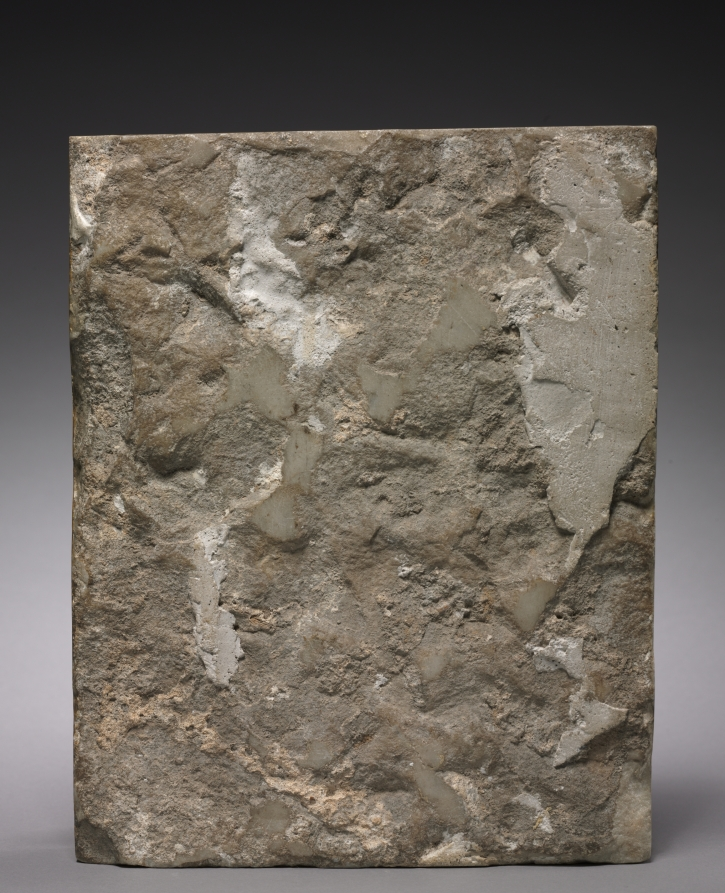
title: Philoctetes on the Island of Lemnos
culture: Italy, 16th century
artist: workshop of Giovanni Maria Mosca (Italian, 1495/99–1574)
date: c. 1510–1515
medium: marble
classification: Sculpture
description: A snake bit the Greek warrior Philoctetes en route to the Trojan War. The stench of the infected wound led the ship’s crew to abandon him on the island of Lemnos, where he fans the agonizing injury with a bird’s wing. The warrior’s noble suffering in the face of tremendous pain would have been a classical model of stoic composure, highly valued in Renaissance court culture.